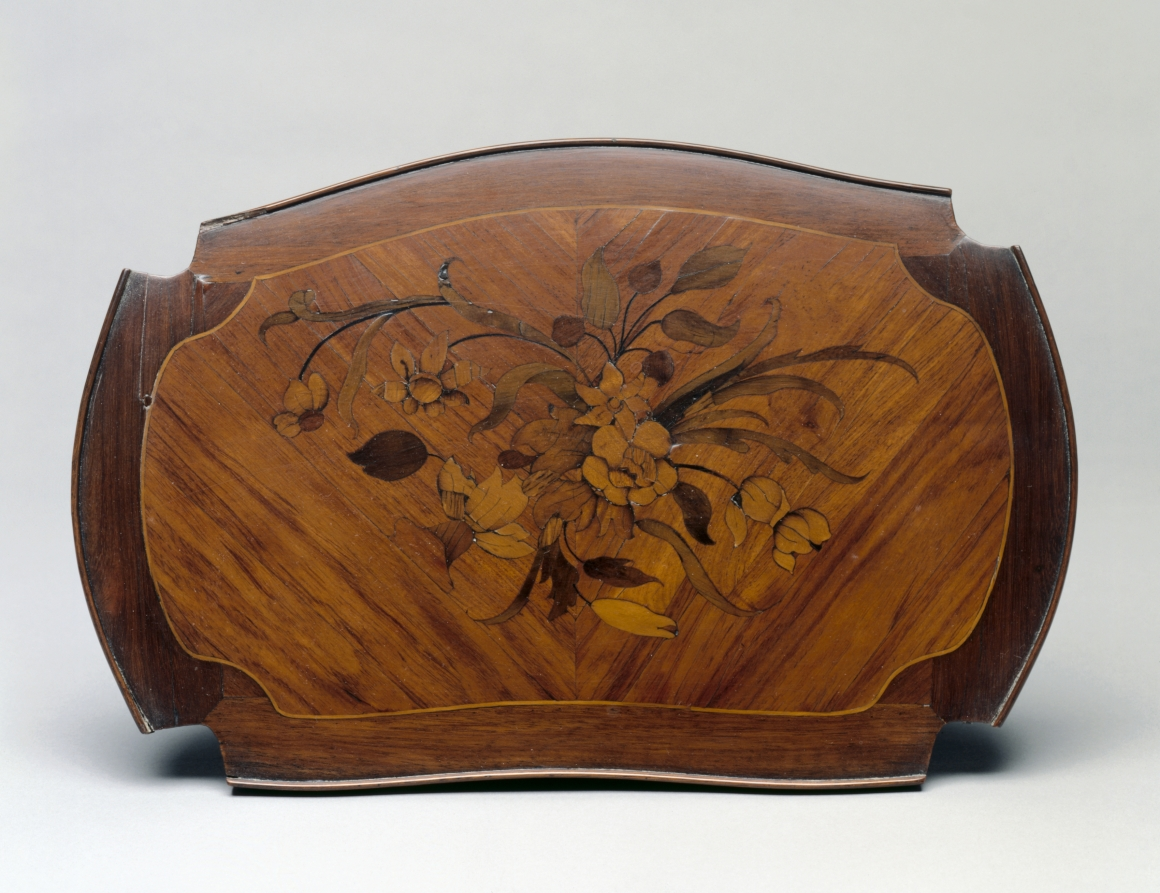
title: Work Table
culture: France, Paris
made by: Bernard Peridiez (French, d. 1757)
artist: or Gerard Peridiez (French, born c.1730)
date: 1700–1799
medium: wood marquetry with gilt bronze mounts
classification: Furniture and woodwork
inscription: signed under shelf: B. Peridiez JNE.